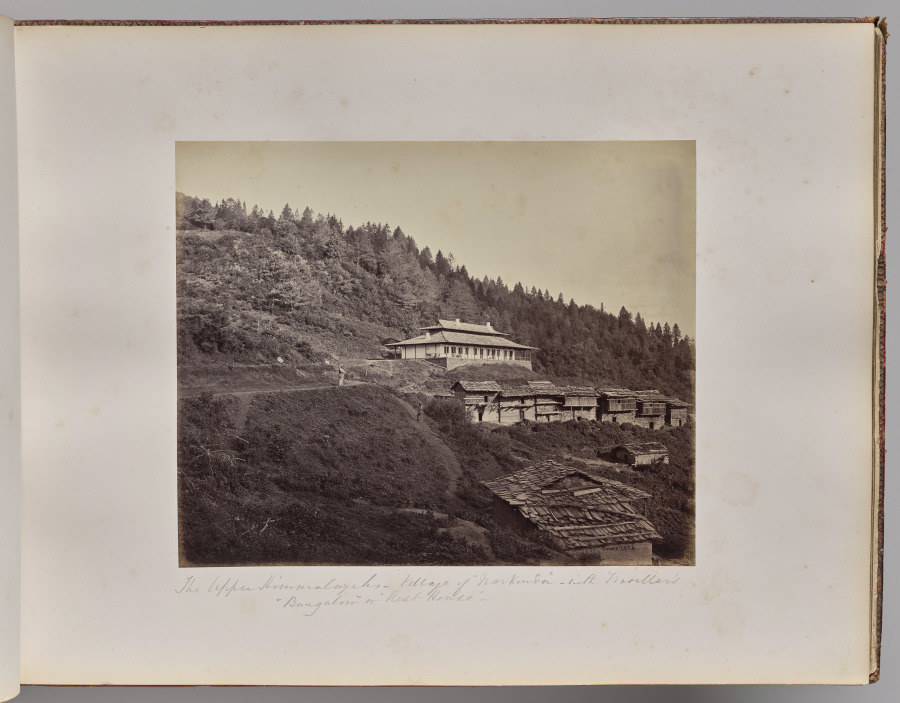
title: The Upper Himmalayahs. Village of Harkundu with Traveller's Bungalow in Rest-House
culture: England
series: Photographs of Northern India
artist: Samuel Bourne (British, 1834–1912)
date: 1863–70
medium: albumen print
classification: Photograph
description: The 50 images in this album, all taken in the 1860s, move from the hill towns of the Himalayas down to cities including Lahore (now in Pakistan), Delhi, Lucknow, Agra, Benares (now Varansi), and Calcutta (now Kolkata). Architectural studies of major monuments offer valuable historical records of what sites such as the Taj Mahal and the imperial mosque of the Mughal emperors in Delhi looked like before twentieth-century restorations.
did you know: Samuel Bourne, the author of most the images in this album, was a banker in England before he moved to India to become a professional photographer.